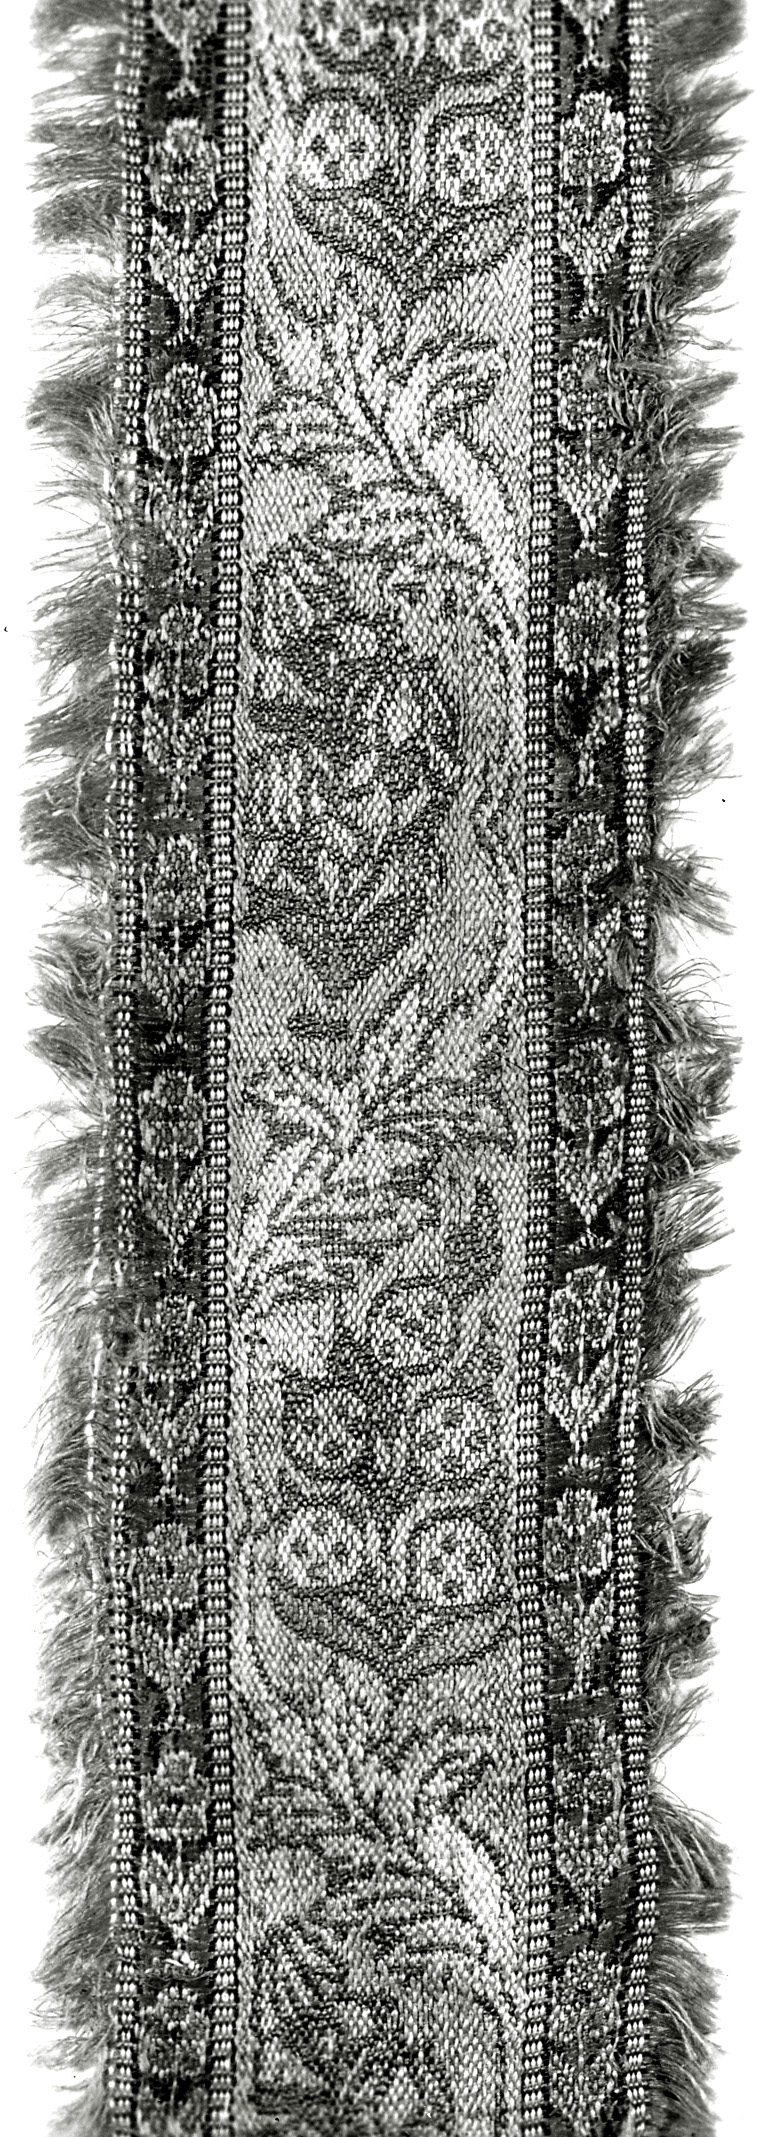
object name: Textile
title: Fragment (Border)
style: isfahan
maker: Iran (Persia, Isfahan)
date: 18th century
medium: Brocaded compound cloth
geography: Iran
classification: textile; weaving